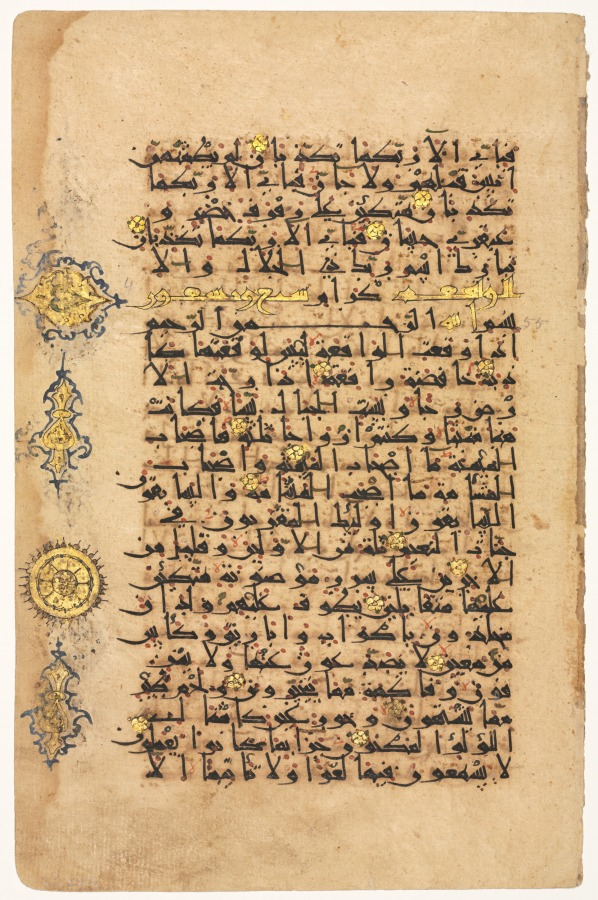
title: Folio from a Qur'an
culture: Iran, Seljuq period (1037–1194)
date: 1100s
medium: ink, gold, and colors on paper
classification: Calligraphy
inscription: Recto: Sura al-Rahman (55: 73–78 end) and Sura al-Waqi'ah (56: 1–part 26). Verso: Sura al-Waqi'ah (56: part 26–part 61).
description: East Persian ornamental Kufic (a script used for Qur’an transcriptions) in black, red, and gold fill this page, which is additionally decorated with gold and blue medallions on its border. Twenty-three lines from the Qur’an’s Surah al-Waqi'ah (The Event, or Day of Resurrection; 56: 1–26) are on the recto and 23 lines from Surah al-Rahman (The Compassionate, 55: 73–78) are on the verso.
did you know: Kufic script was named after the ancient Mesopotamian city Kufa (in today’s Iraq), where it developed.